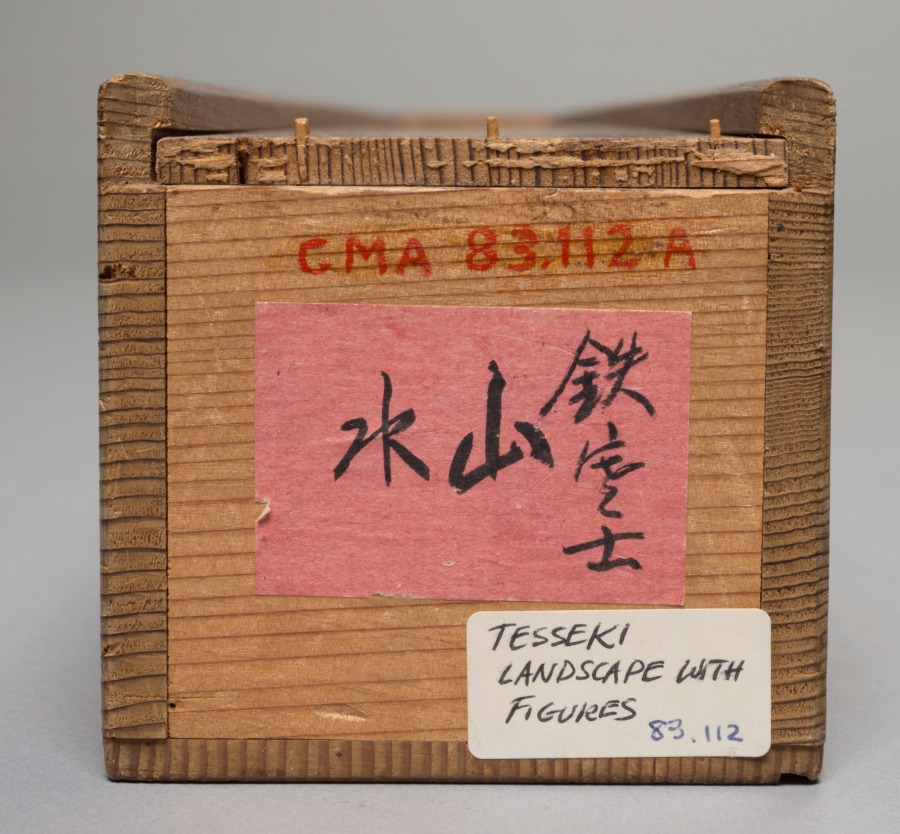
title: Landscape with Figures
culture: Japan, Edo period (1615–1868)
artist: Fujimoto Tesseki (Japanese, 1816–1863)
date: c. 1840–63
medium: hanging scroll; ink and color on paper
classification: Painting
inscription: Artist's inscription and two seals in upper right. A third seal in lower left.